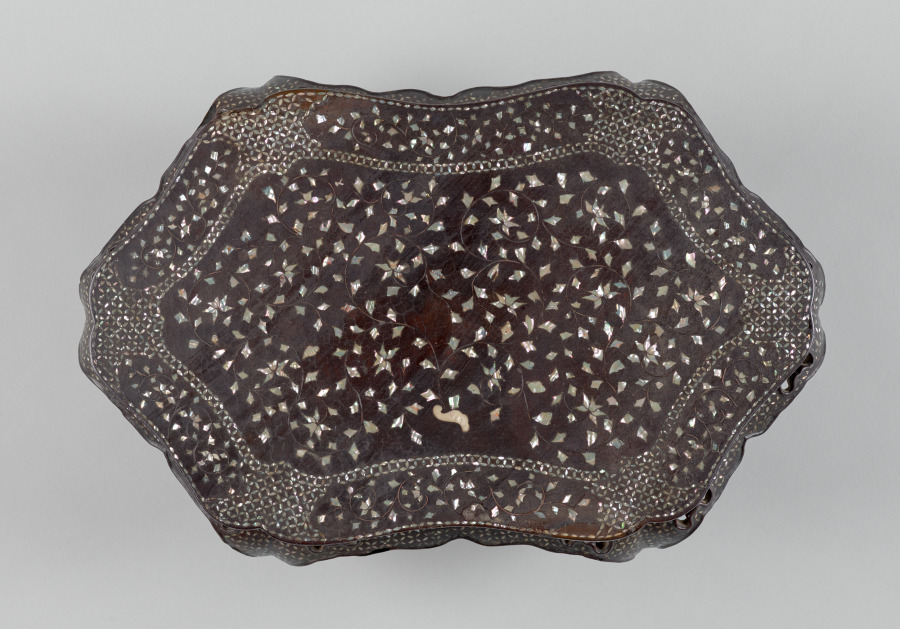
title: Hexafoil-Shaped Table with Mother-of-Pearl Inlay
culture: Korea, Joseon dynasty (1392–1910)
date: late 1400s–early 1500s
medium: Inlaid abalone shells on black lacquer ground, applied with red lacquer on the interior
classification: Lacquer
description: This low table showcases intricate mother-of-pearl and twisted brass-wire inlay forming chrysanthemum scrolls and floral lattices against black lacquer. As one of the few surviving early Joseon lacquer works employing the rare brass-wire technique, it reflects refined craftsmanship made for elite patrons. Likely used in Buddhist offering ceremonies, it would have supported precious ritual objects such as rolls of sutras or miniature Buddhist statuary.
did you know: The use of inlaid twisted brass wires in this mother-of-pearl lacquer table was first introduced in the twelfth century and is believed to have been employed in high-quality lacquerware through the end of the fifteenth century.